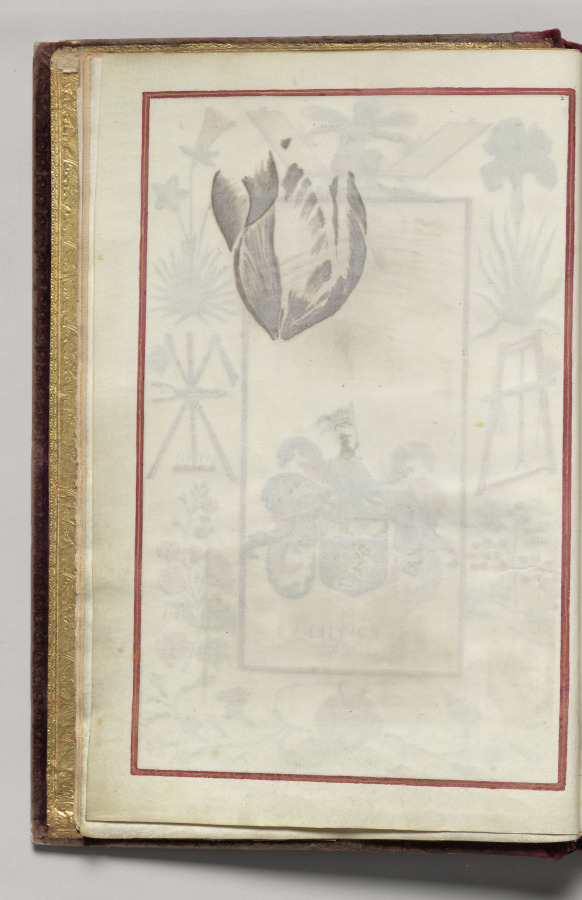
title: Border, folio 1 (verso), from Florilegium (A Book of Flower Studies)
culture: France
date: 1608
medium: watercolor, ink, silver and gold over occasional traces of pencil, on vellum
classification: Bound Volume